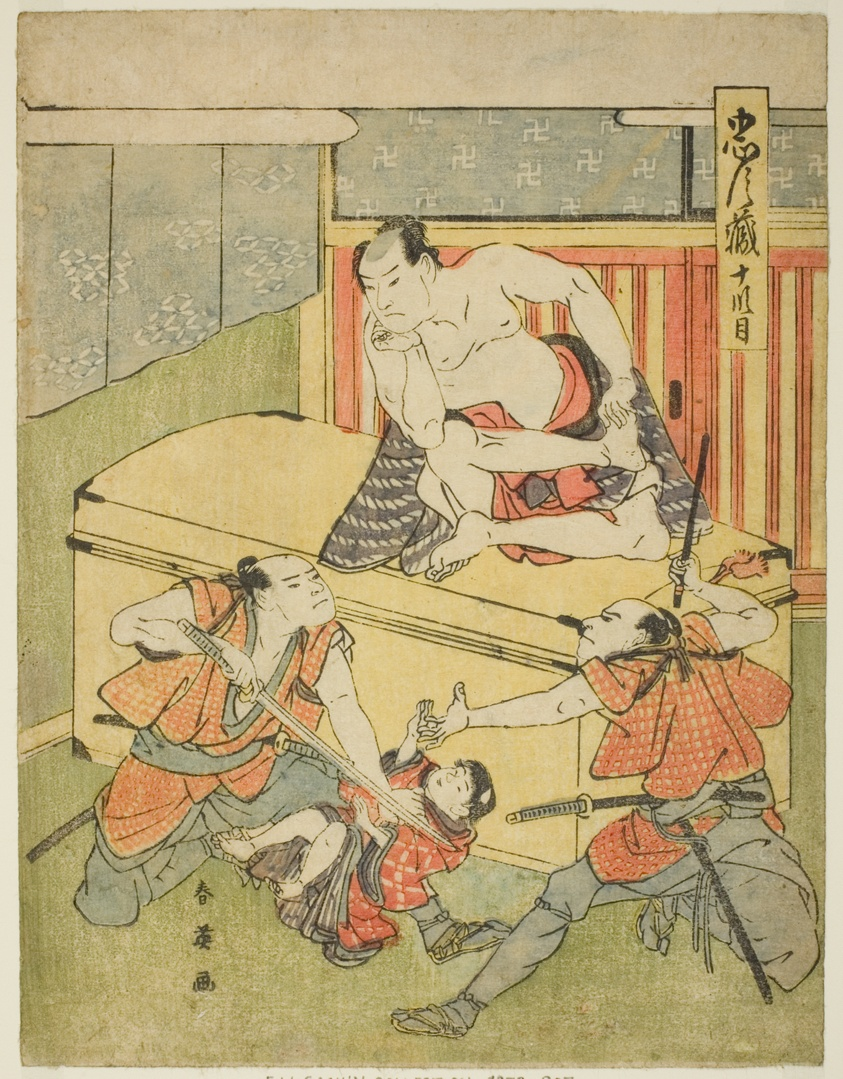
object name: Print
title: Act Ten: Amakawaya House from the play Chushingura (Treasury of the Forty-seven Loyal Retainers)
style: Japanese (culture or style)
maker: Katsukawa Shun'ei (Japanese, 1762-1819)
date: c. 1795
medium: Color woodblock print; koban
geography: Japan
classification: woodblock print; print; asian art